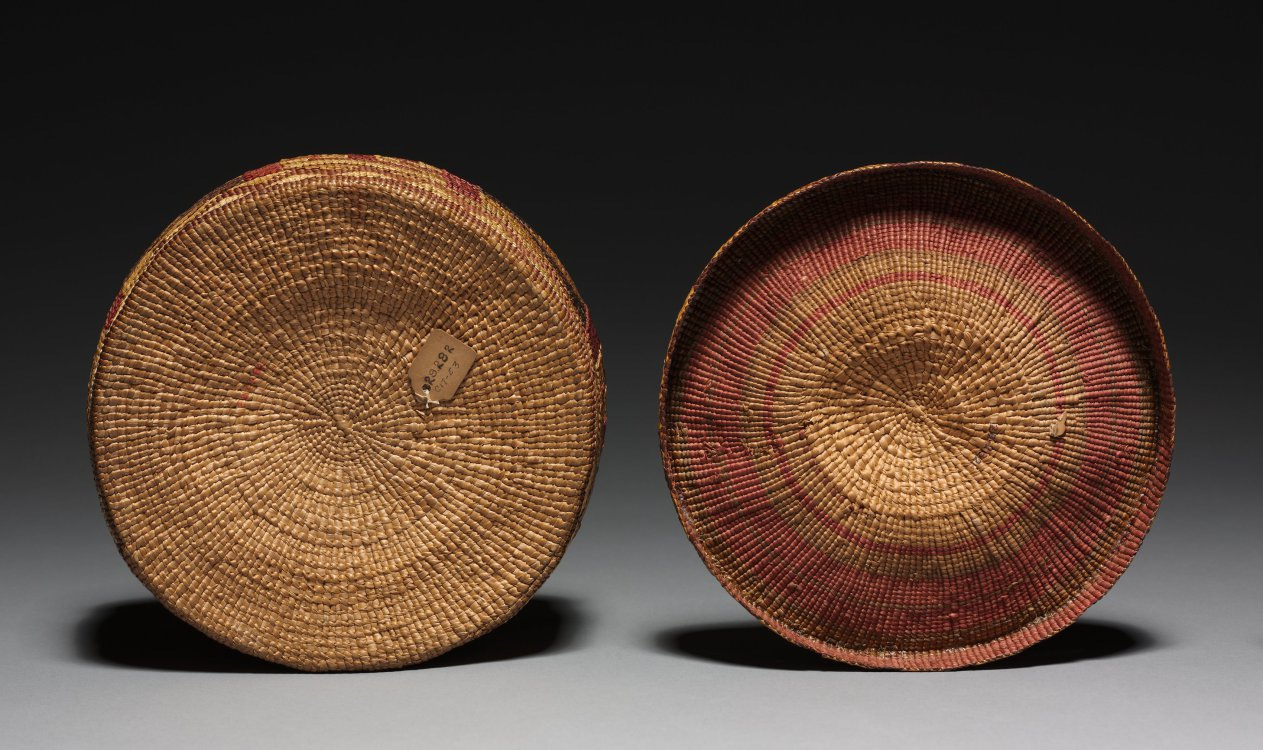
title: Basket with Rattle Top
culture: Northwest Coast, Tlingit, 20th century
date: before 1929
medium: twined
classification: Basketry